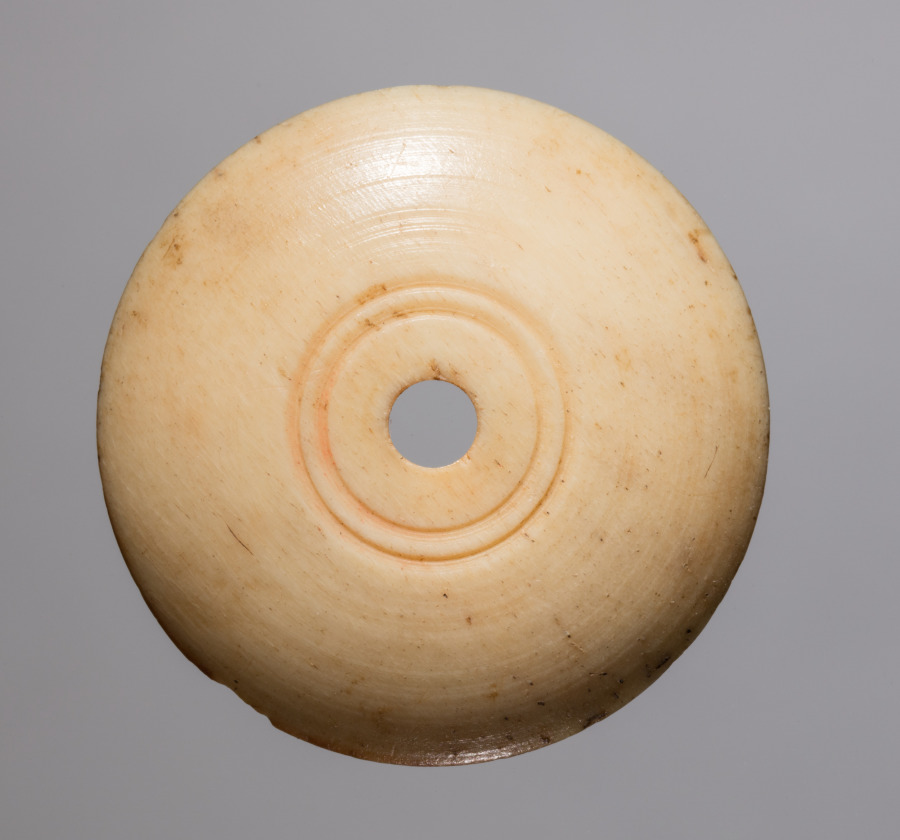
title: Spindle Whorl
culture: Iran, early Islamic period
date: 700s - 900s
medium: bone, incised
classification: Spindle Whorl